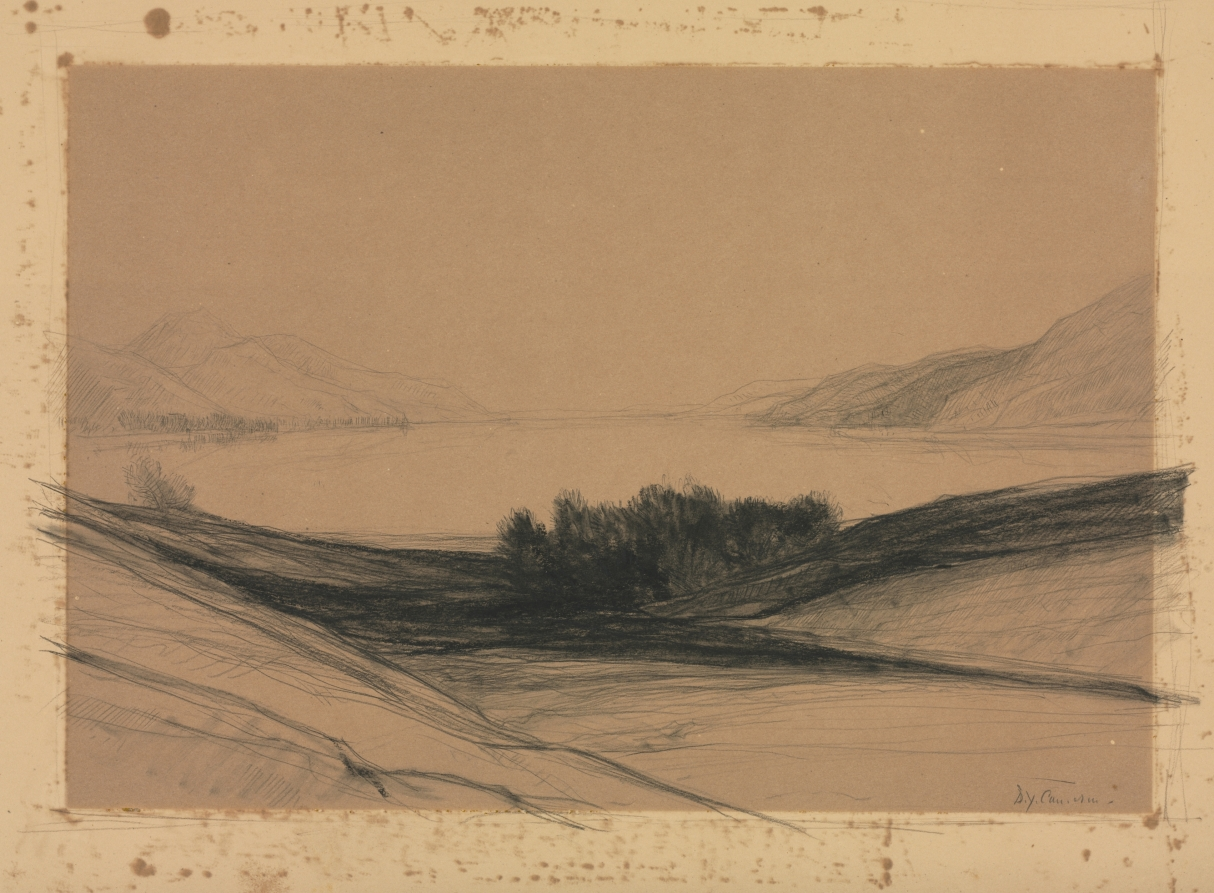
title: Loch Ness, Scotland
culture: England, 19th-20th century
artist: David Young Cameron (British, 1865–1945)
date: c. 1885–1940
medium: charcoal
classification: Drawing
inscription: In charcoal, lower right: "D.Y. Cameron"